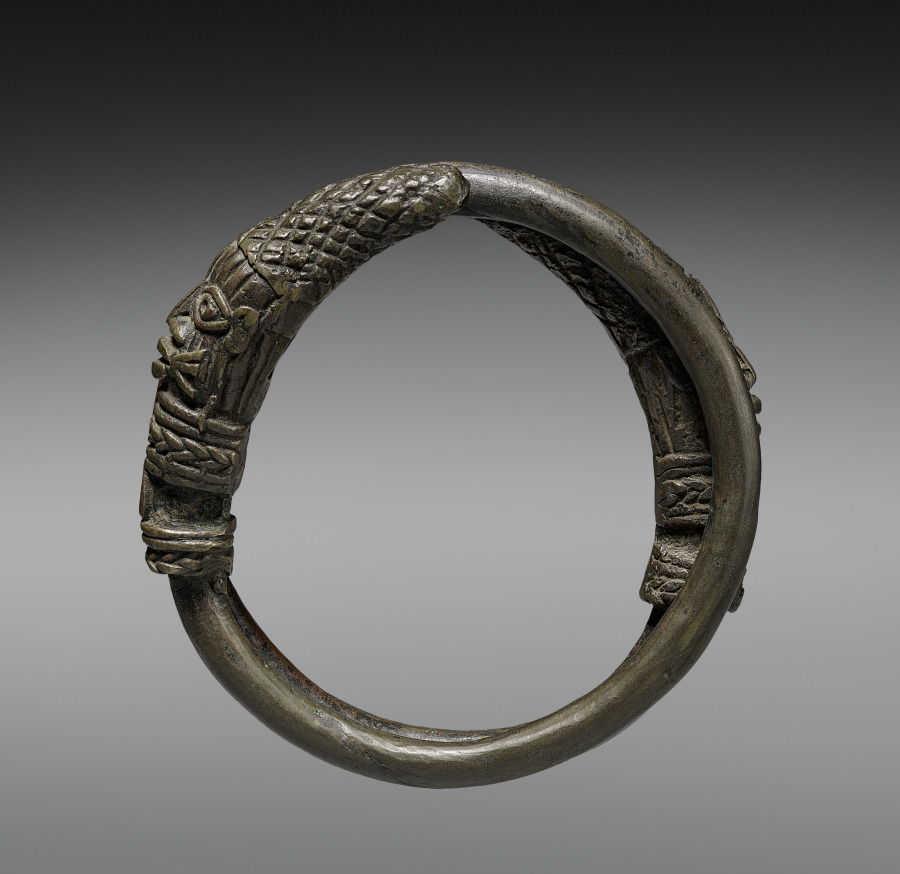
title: Hand Coil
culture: Nigeria, Benin Kingdom, Ẹdo peoples, members of the Igun Eronmwon (royal brasscasters) guild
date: 1800s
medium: Copper alloy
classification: Implements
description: While this looks like a bracelet, it wasn’t worn around a wrist. A chief or titleholder grasped this “hand coil” vertically during the annual Iguẹ festival, during which such men reaffirm their relationship to the Ọba, whose mystical powers are strengthened. An image of a man’s head caps each end of the thick, twisted metal. Repeated human touch rubbed the undecorated lengths bright and shiny. Though small, the coil’s detail is enormous: to capture it, the artist incised the designs in wax during the casting process. They show these men are elites, with necklaces, caps, and whisker-like facial markings.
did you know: This is a unique object; it was made using the lost-wax casting technique, which destroys the wax mold in the creation process.